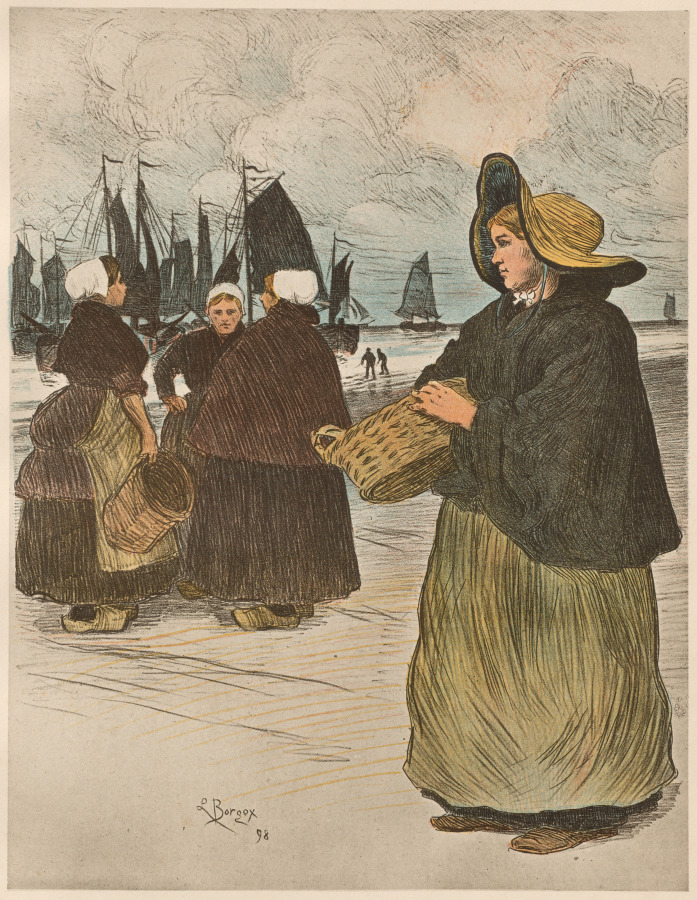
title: Les Sardinières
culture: France, Paris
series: L'Estampe Moderne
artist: Louis Bourgeois Borgex (French, 1873–1959)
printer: Imprimerie Champenois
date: 1898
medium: Color lithograph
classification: Bound Volume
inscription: In plate: lower margin of image: L Borgex / 98; lower right corner of sheet: blindstamp of l'Estampe Moderne (Lugt 2790)